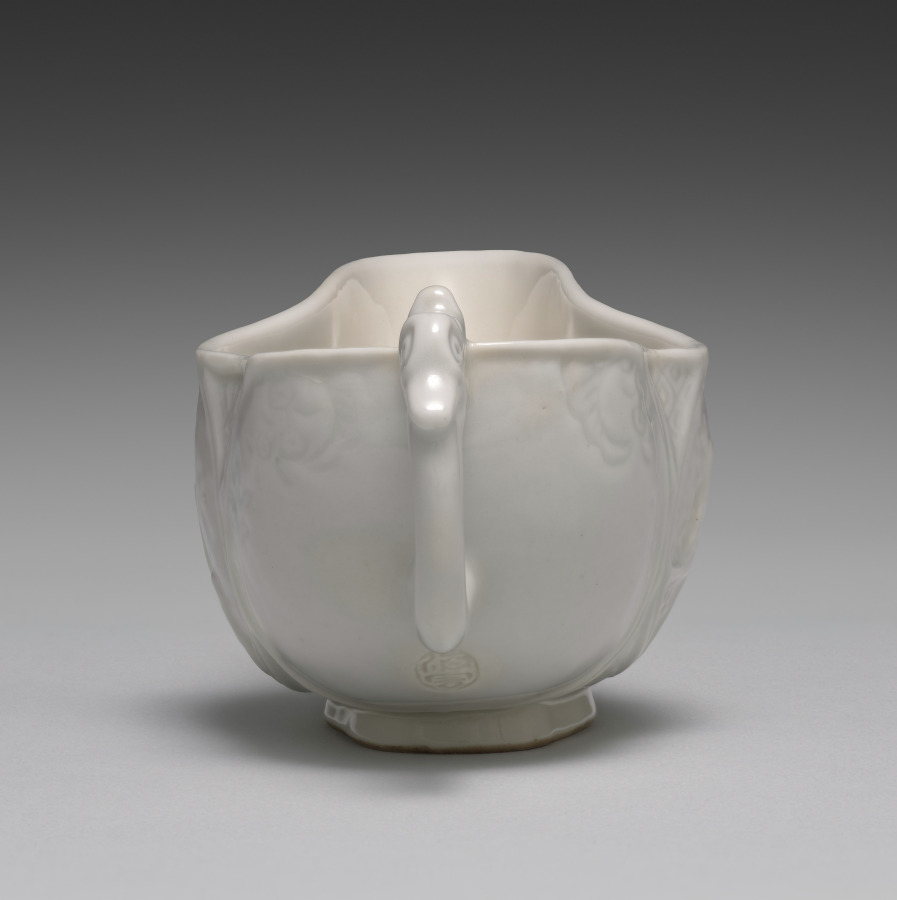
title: Water Cooler with Chinese Gardens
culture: Japan, Meiji period (1868–1912)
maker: Seifū Yohei III (Japanese, 1851–1914)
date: 1893–97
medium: Porcelain with molded and carved designs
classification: Ceramic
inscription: Artist's seal beneath the handle.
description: Unlike most pieces by the Seifu Yohei studio, this one bears a seal beneath the handle rather than on the base. The glaze and technique are identified on the box as taihakuji, or “great white porcelain,” an important early invention Yohei III devised in 1872 that involved the combination of a distinctive translucent, creamy glaze over an ivory-colored clay body. The body’s two sides have garden scenes seen through windows. Designs of flowers and butterflies are incised in the spaces at both ends. The garden on the right-hand side of the vessel, seen through a round window, has a decorative rock with grasses beneath a cloudy sky; and on a tiled veranda, there is a teapot as well as a fan and two scrolls inserted into a double-handled urn or kettle atop a brazier. The garden on the left-hand side has two enormous flowers below what may be either a cloud or a rippling pond; a garden rock—or perhaps a carved wood sculpture—with a circular perforation sits on what appears to be a veranda. While the details may be open to interpretation, the setting is a rather glamorous Chinese residence or palace with a superbly tended garden in spring or summer.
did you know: This water cooler has a handle with a dragon head.